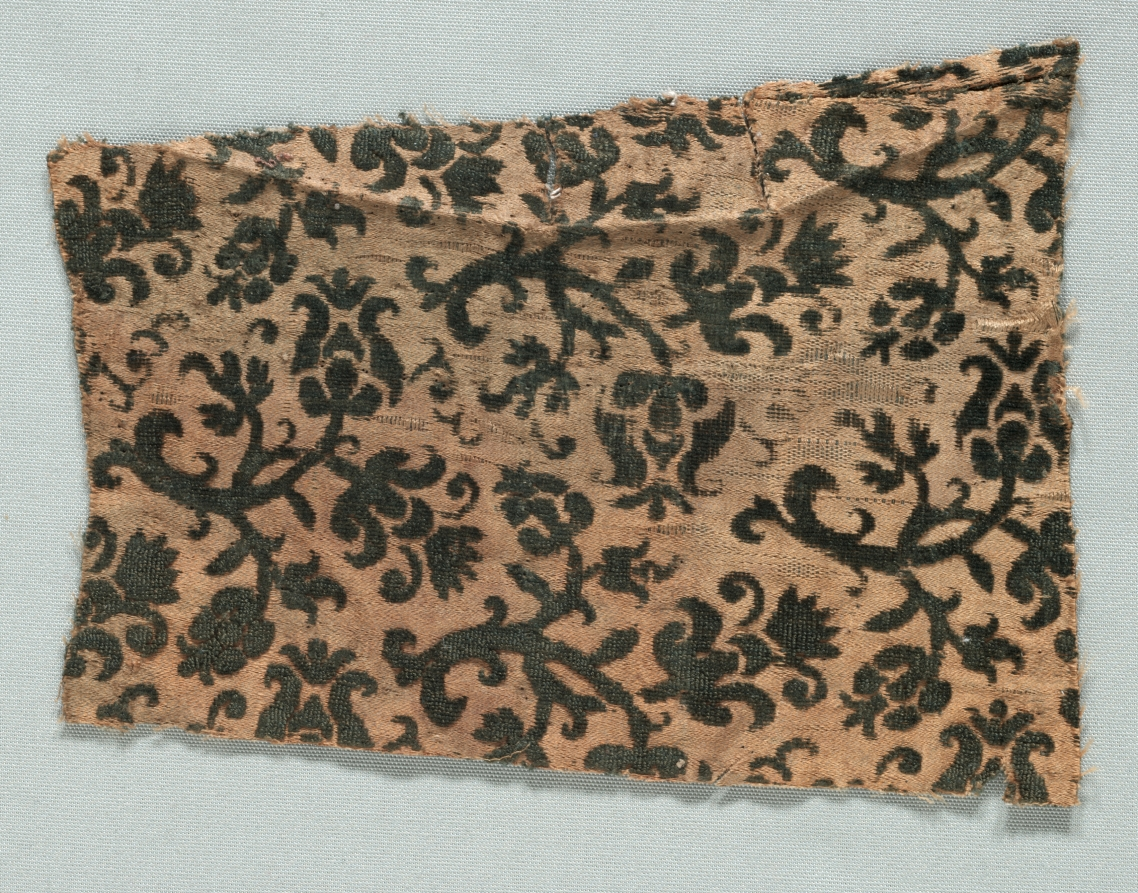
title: Velvet Fragment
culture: Italy, 17th century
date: 1600s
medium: velvet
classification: Velvet